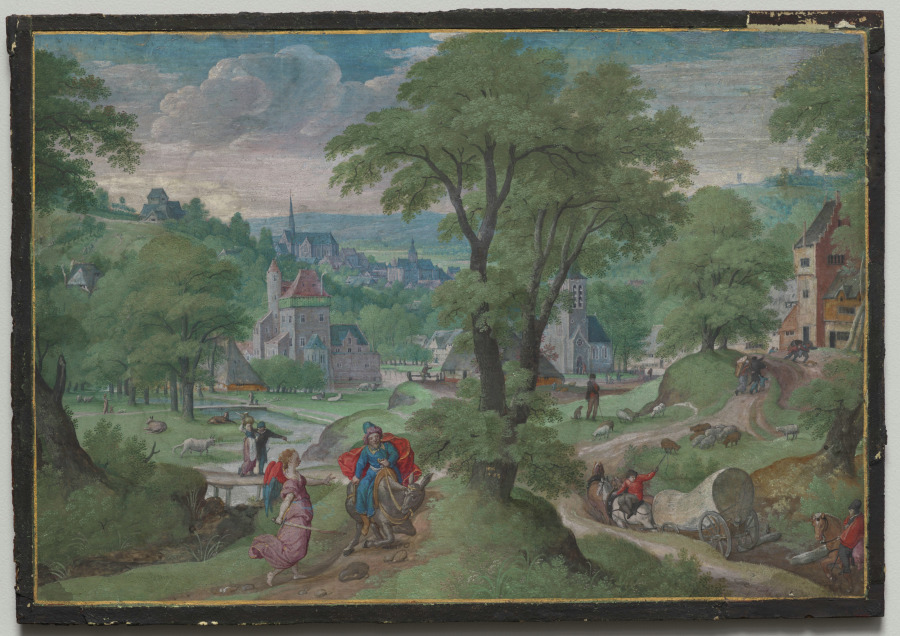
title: Balaam and the Ass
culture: Netherlands, 16th century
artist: Hans Bol (Flemish, 1534–1593)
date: 1583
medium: Gouache heightened with gold on vellum laid down on panel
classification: Drawing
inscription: Signed and dated in gold, on the trunk of the central tree: HBol 1583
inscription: bears old numbering on the panel verso: No 28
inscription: old inventory number on a label, verso: 268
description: While this small miniature, made with watercolor on parchment, depicts a scene from the Old Testament in the left foreground, its primary subject is the expansive rural scene, landscape, and distant hillside city beyond. Hans Bol combined realistic city views, based on his onsite observation, with imaginary scenes and narratives, appealing to his late-16th-century urban Netherlandish audience. The story of the Balaam and the Ass was associated with greed in the period. The miniature was likely paired with other scenes highlighting contemporary moral issues to be displayed together in a domestic setting.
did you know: This work is mounted on panel, suggesting that it was once inlaid into a piece of furniture or wainscotting in a wealthy 16th-century home.